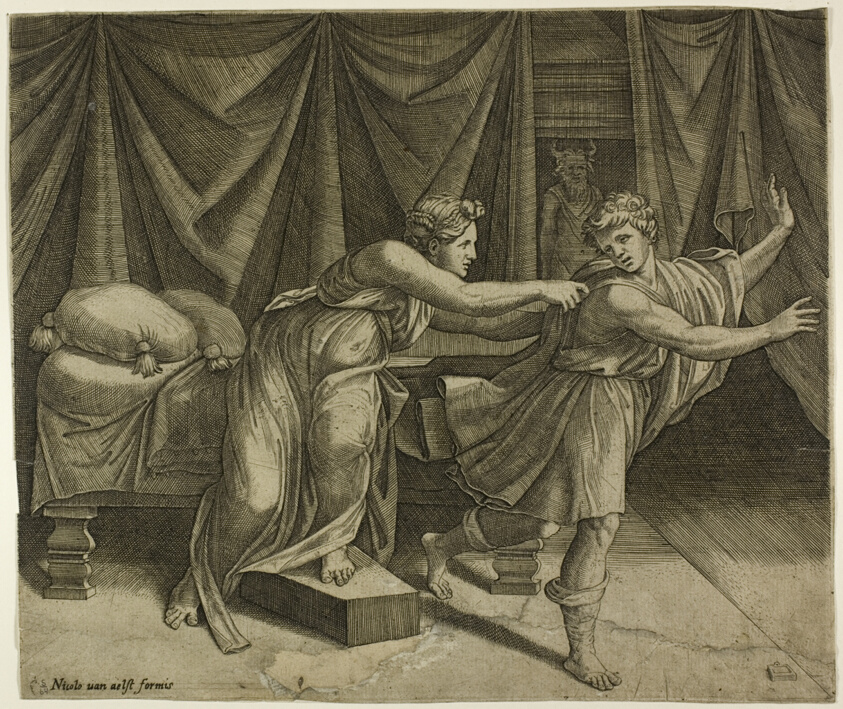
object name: Print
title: Joseph and Potipher's Wife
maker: Marcantonio Raimondi (Italian, c. 1480-1534); after Raffaello Sanzio, called Raphael (Italian, 1483-1520)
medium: Engraving in black on paper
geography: Italy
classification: engraving; print; prints and drawing